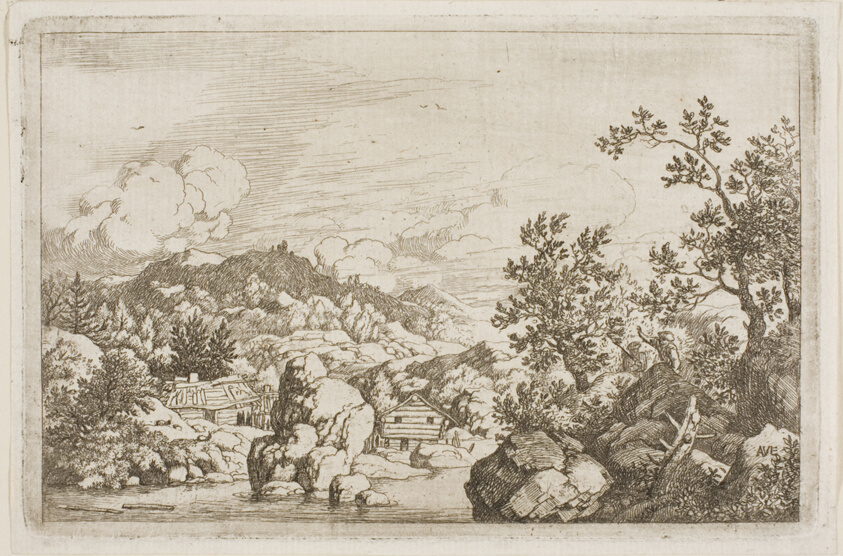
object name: Print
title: River Between Rocks and Wooden Huts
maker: Allart van Everdingen; Dutch, 1621-1675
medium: Etching on ivory paper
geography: Holland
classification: etching; print; prints and drawing